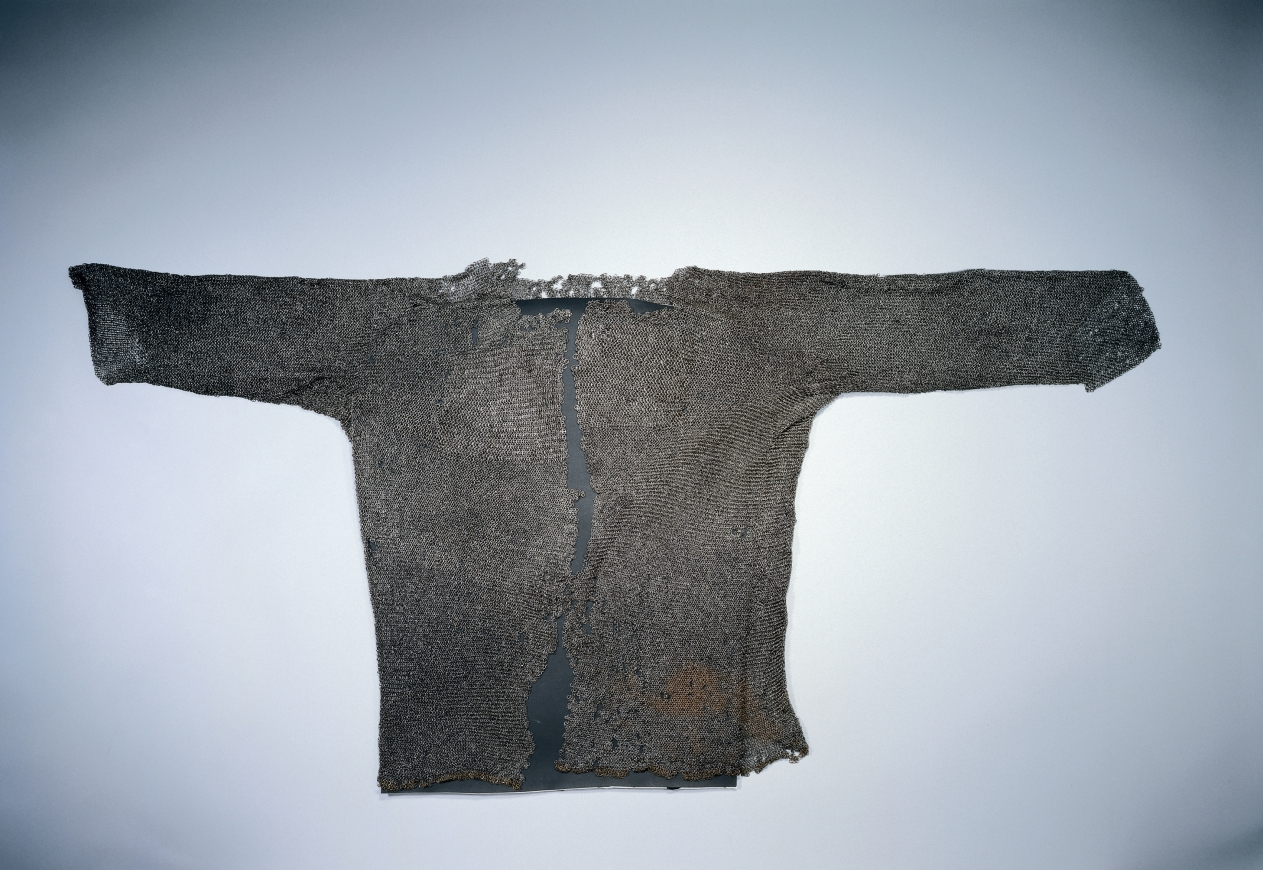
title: Hauberk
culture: Europe, 15th century; India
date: 1400s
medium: very fine rings; border of brass rings at bottom edge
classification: Arms and Armor